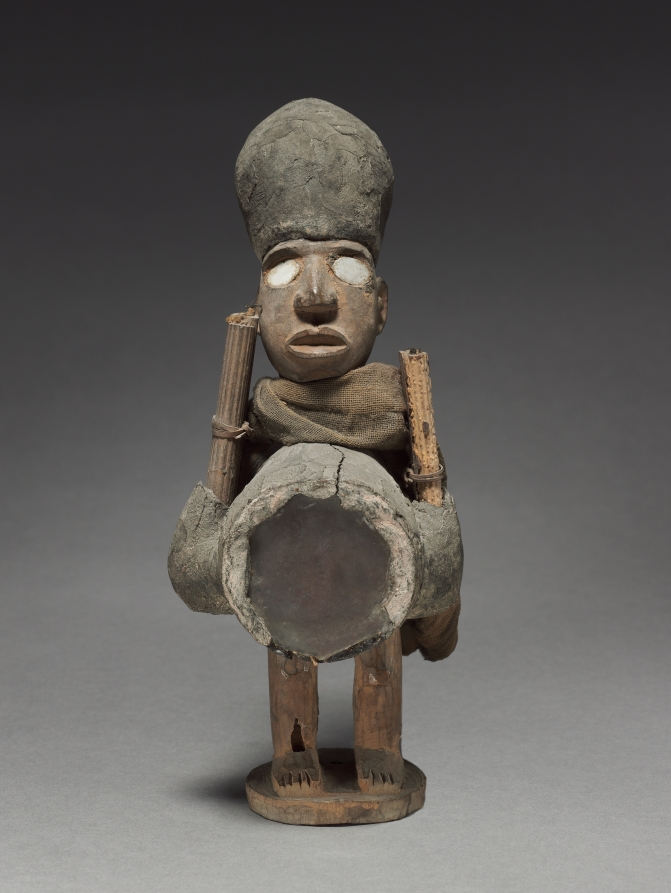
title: Power figure (nkisi)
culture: Africa, Central Africa, Republic of the Congo, Kongo-style maker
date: late 1800s–early 1900s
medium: Wood, organic materials (including resin), cloth, metalized glass, possibly porcelain, and plant fiber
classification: Sculpture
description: This figure is one of the two tallest of the seven anthropomorphic minkisi figurines previously in the Delenne collection. Identified as an nduda, two upward “guns” are attached on its side loaded with gunpowder used to shoot witches. Its label bears the word colique, a term referring to heavy pains caused by intestinal obstruction.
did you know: The object’s two small guns are pointing upward, but bears the label “colique,” a term referring to heavy pains caused by intestinal obstruction.